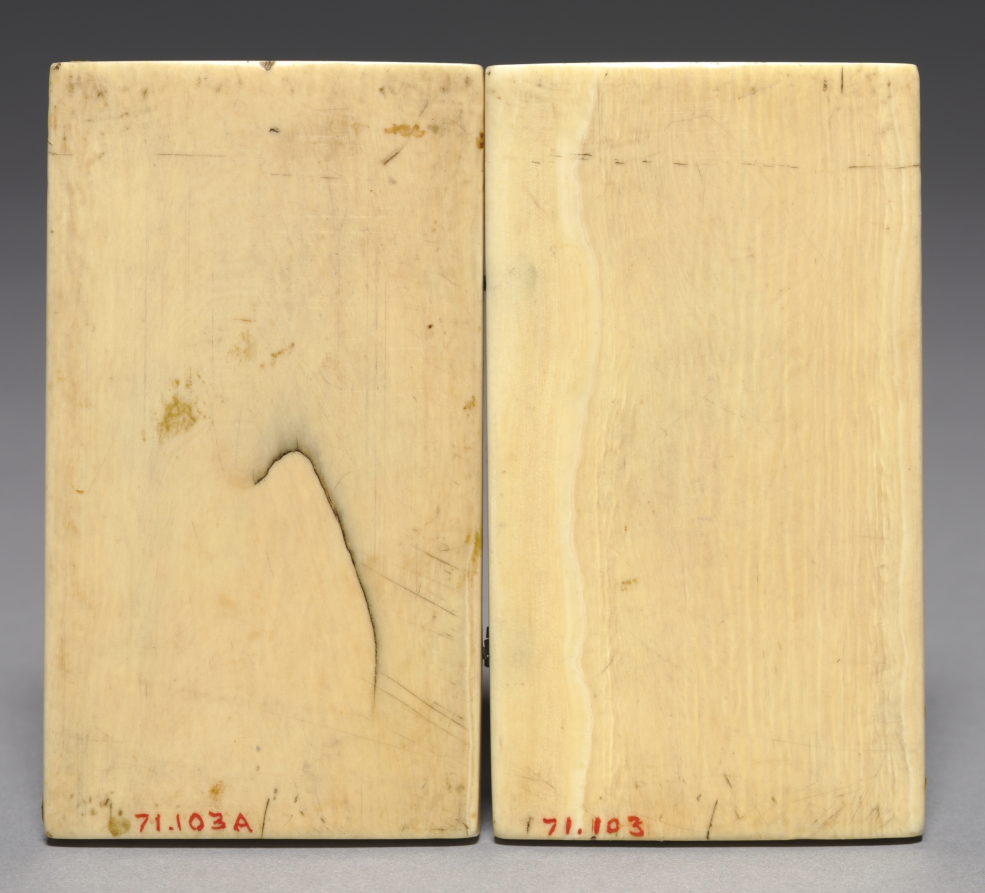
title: Diptych with Scenes from the Life of Saint Martin of Tours: The Consecration of Saint Martin as Bishop (left); Saint Martin Shares his Cloak with a Beggar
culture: Germany, Cologne, 14th century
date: 1340–1350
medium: ivory with polychromy and gilding, original silver hinges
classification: Ivory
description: This beautiful and well-preserved diptych includes its original polychromy, gilding, and silver hinges, though these are no longer connected. With its lapis background, red roof tiles, and gilded details of the figures’ clothing, the appearance is one of luxuriousness. The diptych provides us with a rare and vivid impression of how such devotional ivories were originally decorated in the 1300s.